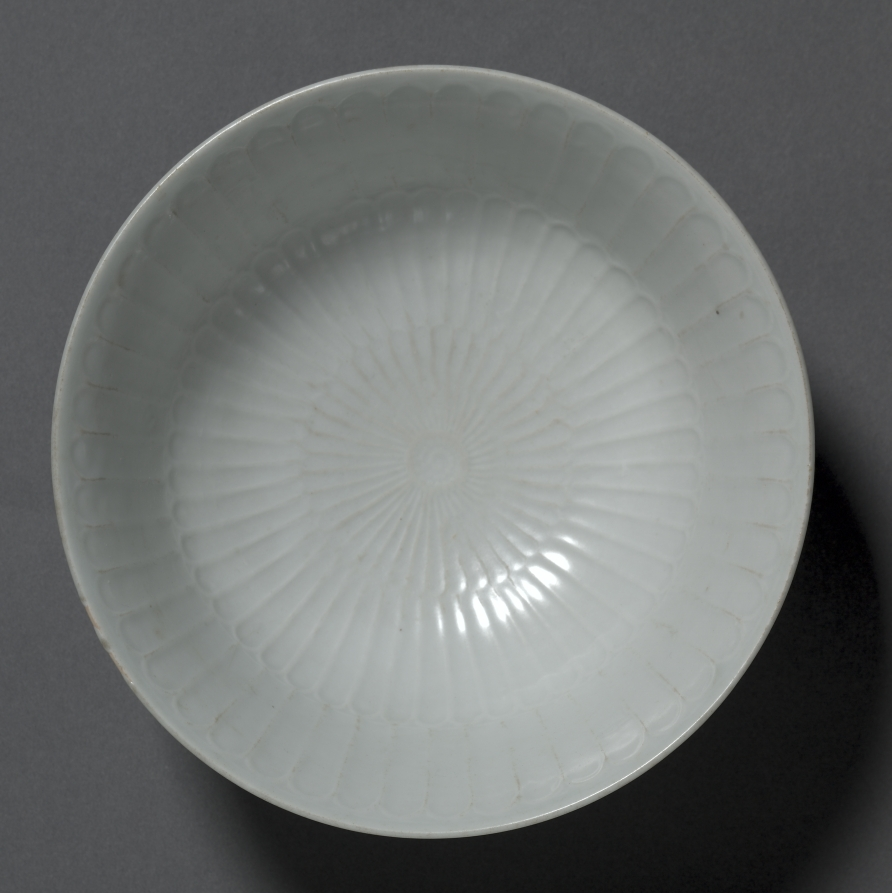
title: Bowl with Flower Petals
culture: China, Jiangxi Province, Jingdezhen, Yuan dynasty (1271–1368)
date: 1300s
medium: glazed porcelain with molded decoration, Shufu ware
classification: Ceramic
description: Yuan dynasty Shufu ware was a further development of the earlier qingbai ware and is characterized by a more heavily constructed body, opaque white glaze, molded decoration, and at times the inscription Shufu that gives the ware its name. Although lacking the inscription here, this bowl possesses the characteristics and decoration of Shufu pieces.